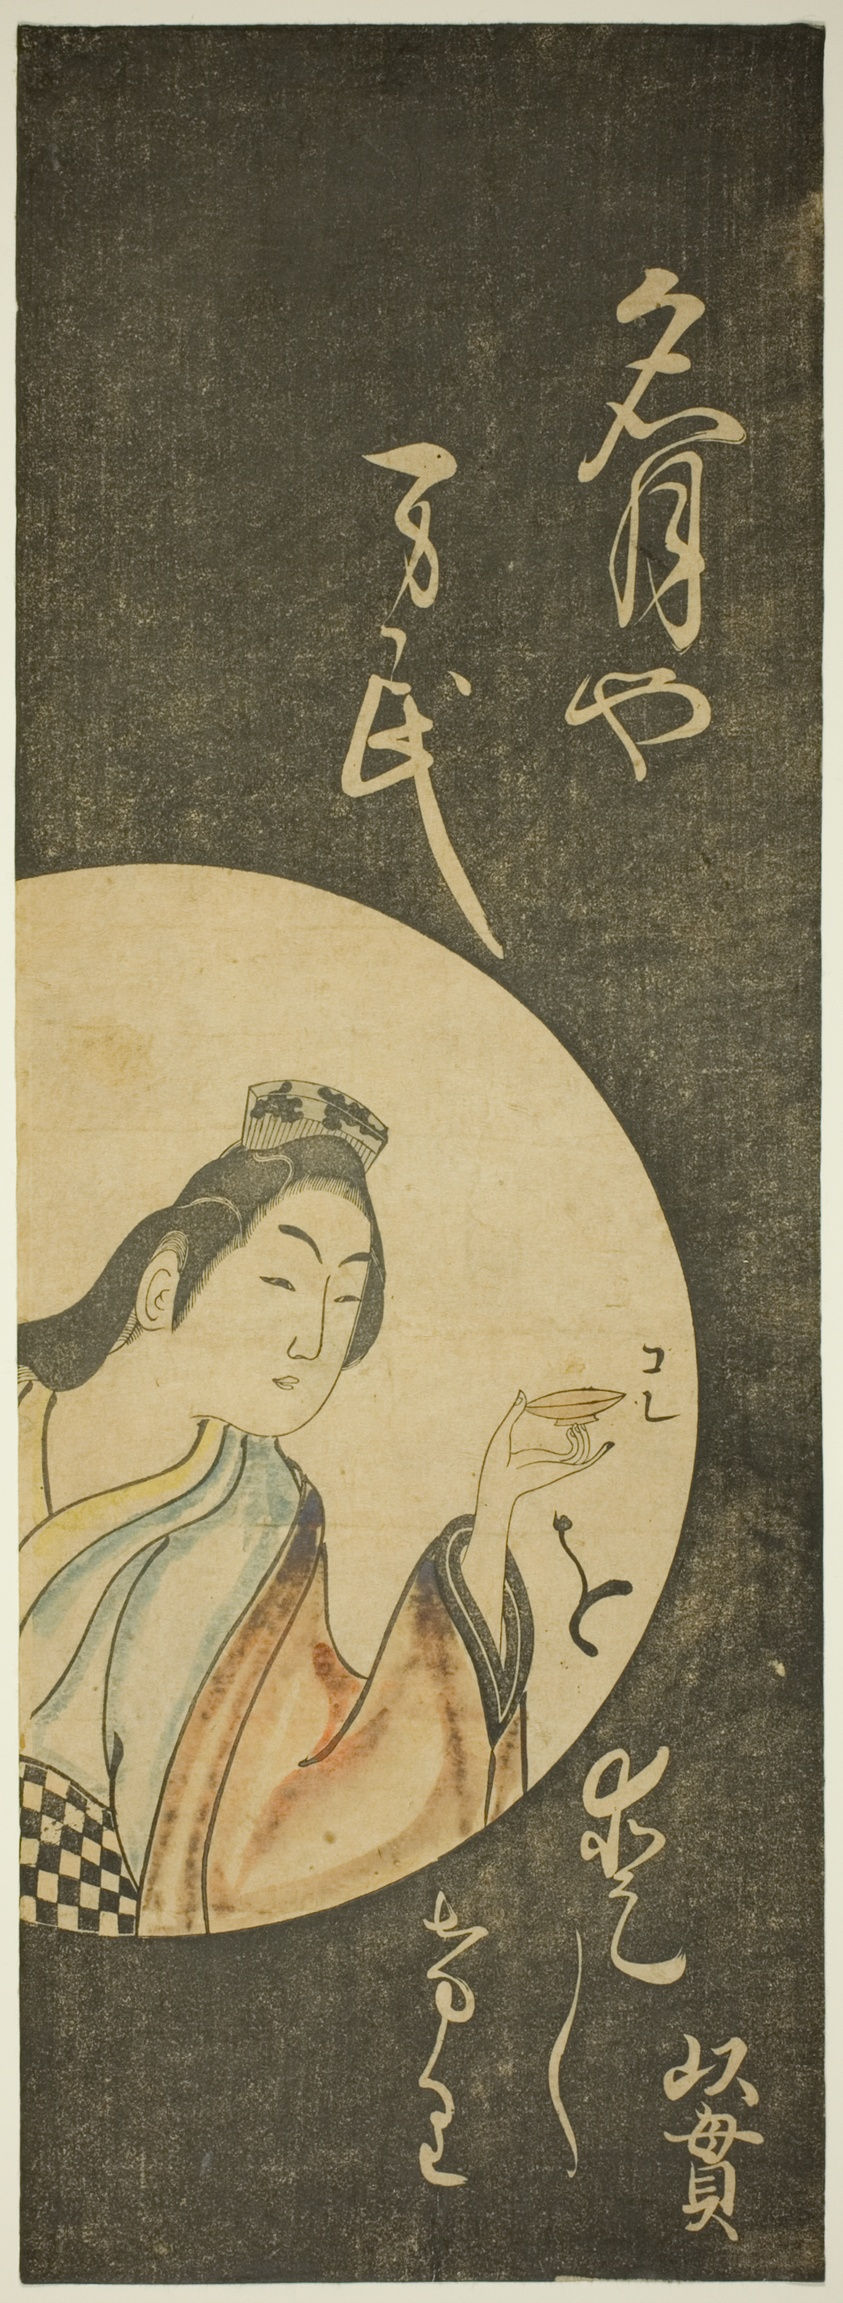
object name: Print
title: The Full Moon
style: Japanese (culture or style)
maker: Artist unknown; Japanese, 18th century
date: 18th century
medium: Hand-colored woodblock print; o-oban, sumizuri-e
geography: Japan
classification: woodblock print; print; asian art